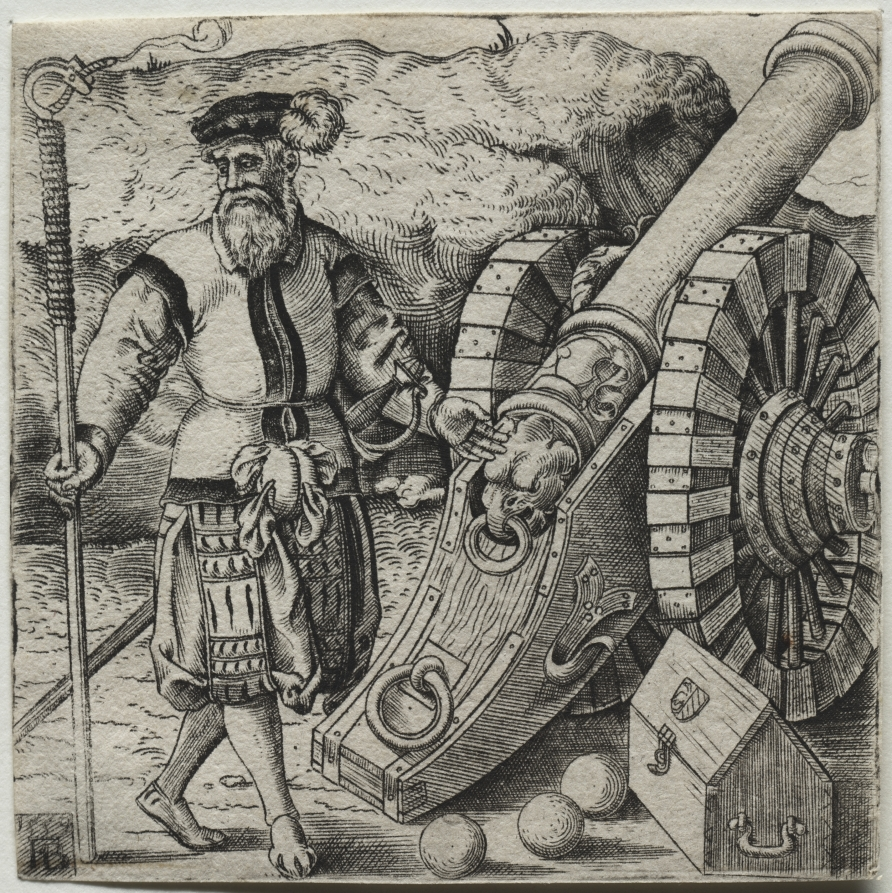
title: The Gunner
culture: Germany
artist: Franz Brun (German)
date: 1559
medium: engraving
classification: Print